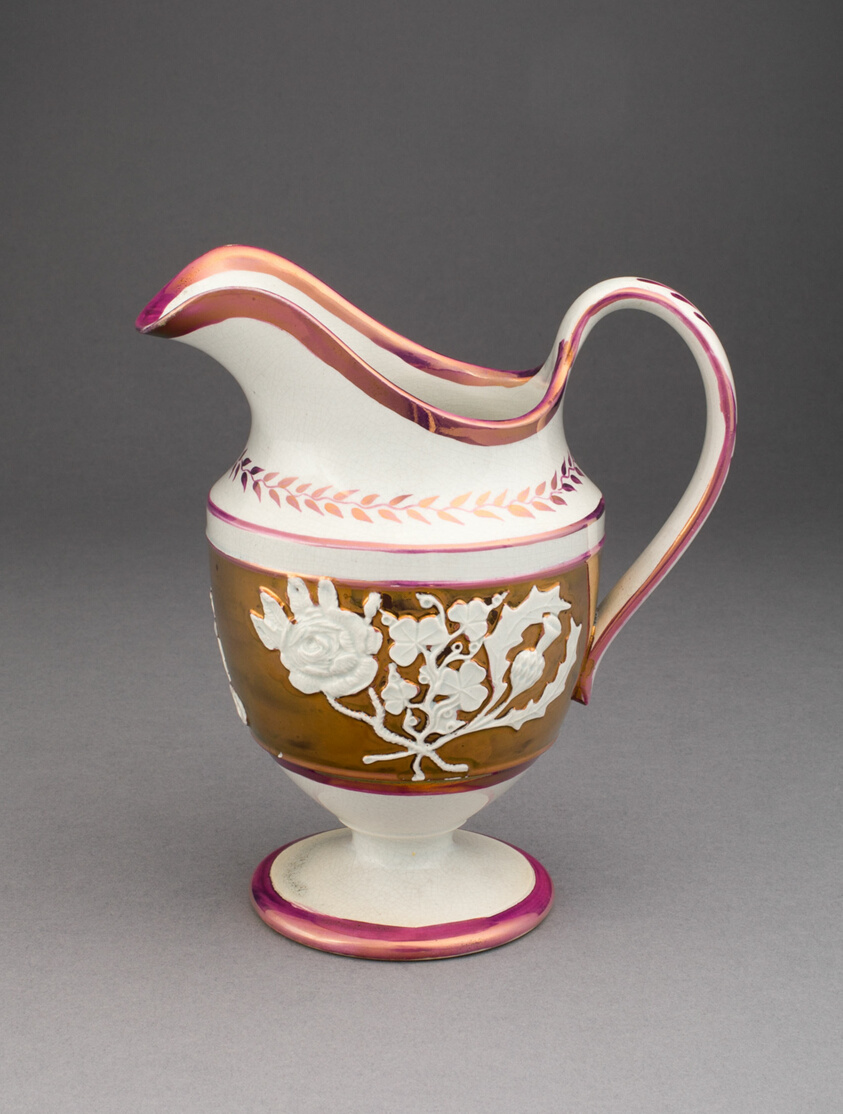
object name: Ceramics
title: Creamer with Symbols of England, Ireland, and Scotland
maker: England, Staffordshire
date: c. 1830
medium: Earthenware with copper lustre decoration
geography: Staffordshire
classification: earthenware; european decorative arts; ceramics